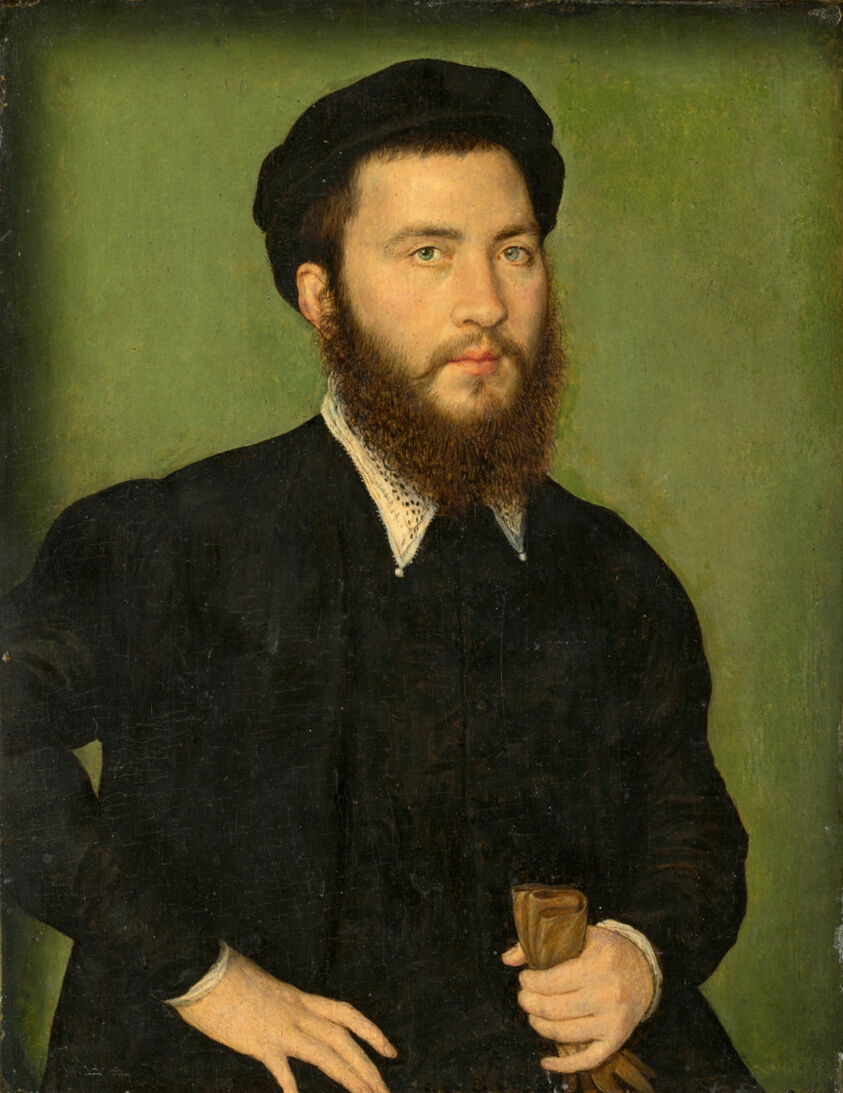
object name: Painting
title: Portrait of a Man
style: 16th Century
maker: Corneille de Lyon (French, 1500/10–1575)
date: 1550/60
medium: Oil on panel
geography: France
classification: oil on panel; paint; portrait; painting; european painting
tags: portraits: male subject, men, man, portraits: European subject, portrait